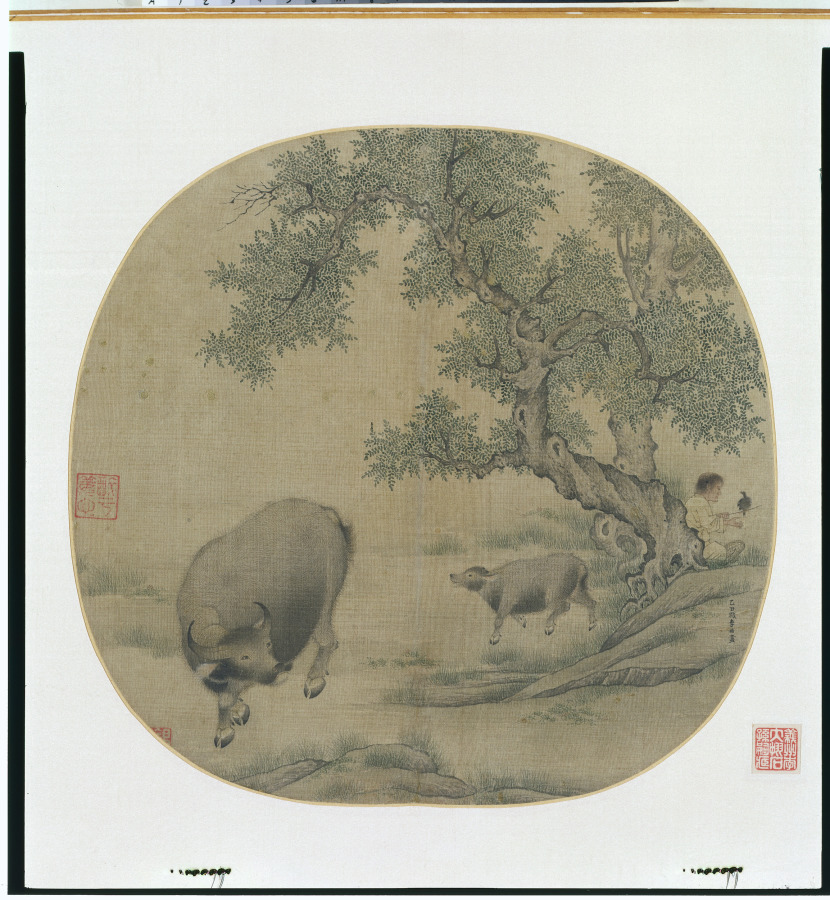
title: Man, Buffalo, and Calf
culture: China, Southern Song dynasty (1127-1279)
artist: Li You (Chinese, active c. 1145)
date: 1145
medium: album leaf; ink and color on silk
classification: Painting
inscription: Artist's inscription: 乙丑歲李祐/椿畫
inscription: 3 seals: 1 of Wu T'ing (c. 1600); 1 of An Kuo (1481–1534); 1 of Li Pao-hsün (1858–1915)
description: Here, a herdboy tending a cow with a calf is sitting beneath a tree with his pet myna bird. The painting can be read as a pastoral scene. As the water buffalo helped plow the fields, it was perceived as an animal that endures hard work without gain for itself, often interpreted as a metaphor for the official. Ox-herding pictures, presented as gifts in court circles, were used for their moral and political rhetoric. The Yijing (Book of Changes) states, The Receptive is the earth, the mother . . . it is a cow with a calf . . . the multitude [in relation to the ruler].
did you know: Li You included such tiny details as circular patterns of hair on the buffalo’s hindquarters.